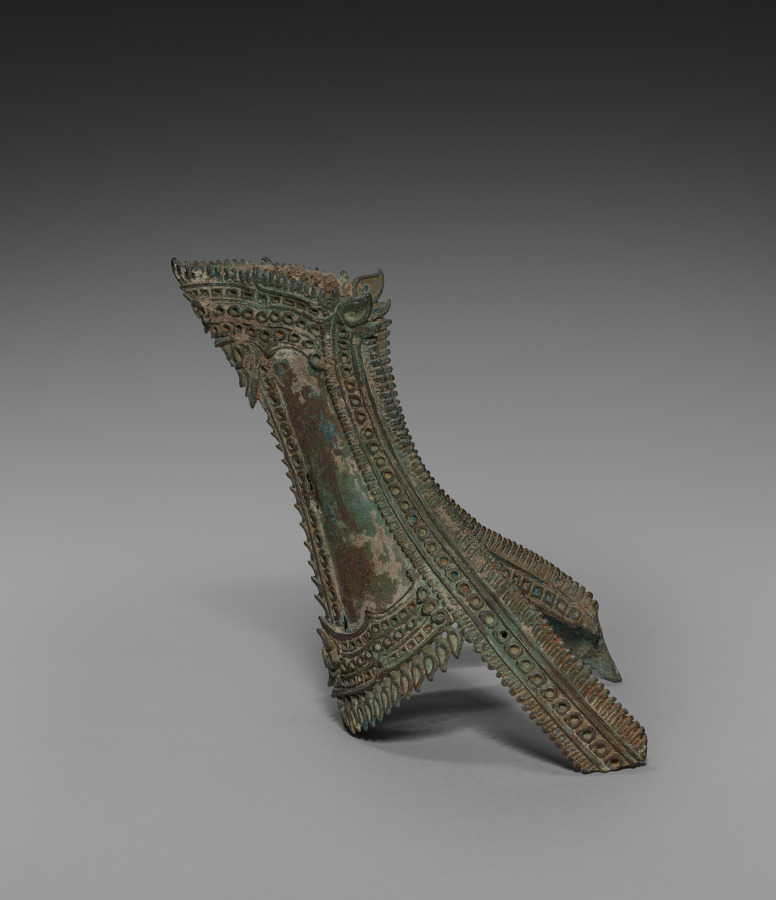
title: Sheath for ritual conch shell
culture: Cambodia, Khmer, Angkor period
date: 1100s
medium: shell and bronze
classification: Sculpture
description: A royal temple like Banteay Chhmar was built for performing rituals and to honor images of gods, Buddhas, and other sacred or enlightened beings for the sake of the kingdom’s protection and ongoing prosperity. Conch shells were blown at the start of rituals to make the sound corresponding to the syllable om. The dancing figure of Hevajra, a Buddhist being of enlightenment with eight heads, sixteen arms, and four legs, has been worked into the bronze embellishment of the shell. Hevajra was elevated to a prominent position in Khmer Buddhism of the Angkorian period as the standard figure denoting the practice of rituals prescribed in a text called the Hevajra-tantra. The tripod stand with three serpents is probably not original to the shell.